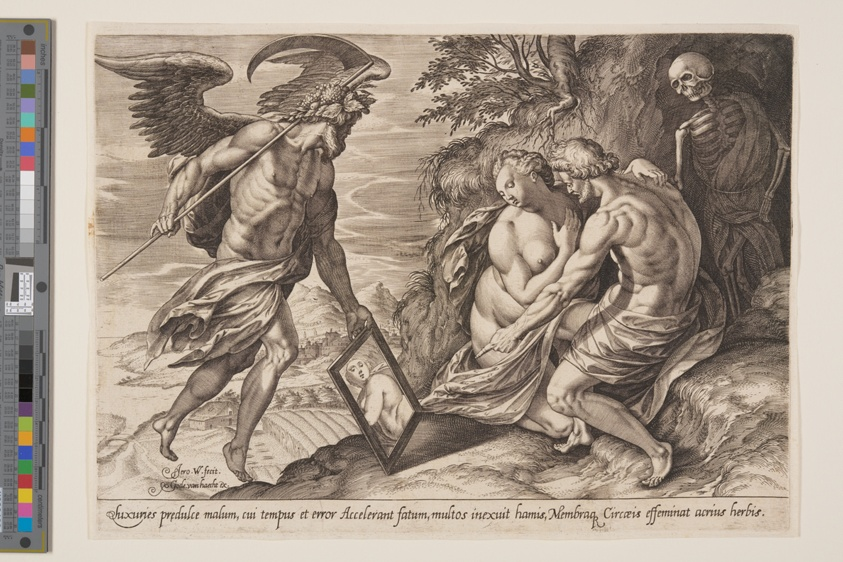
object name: Print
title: Allegory of Love, Time, and Death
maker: Hieronymus Wierix; Flemish, 1553–1619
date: c. 1580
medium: Engraving on ivory laid paper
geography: Flanders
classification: engraving; paper; print; prints and drawing